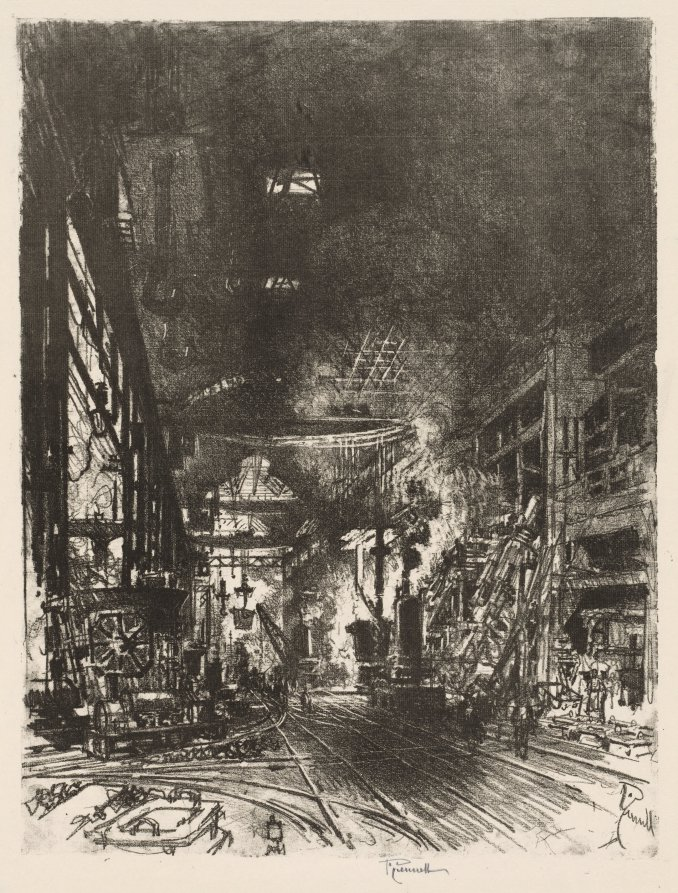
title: English War Work: Within the Furnaces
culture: America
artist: Joseph Pennell (American, 1857–1926)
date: 1916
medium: lithograph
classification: Print